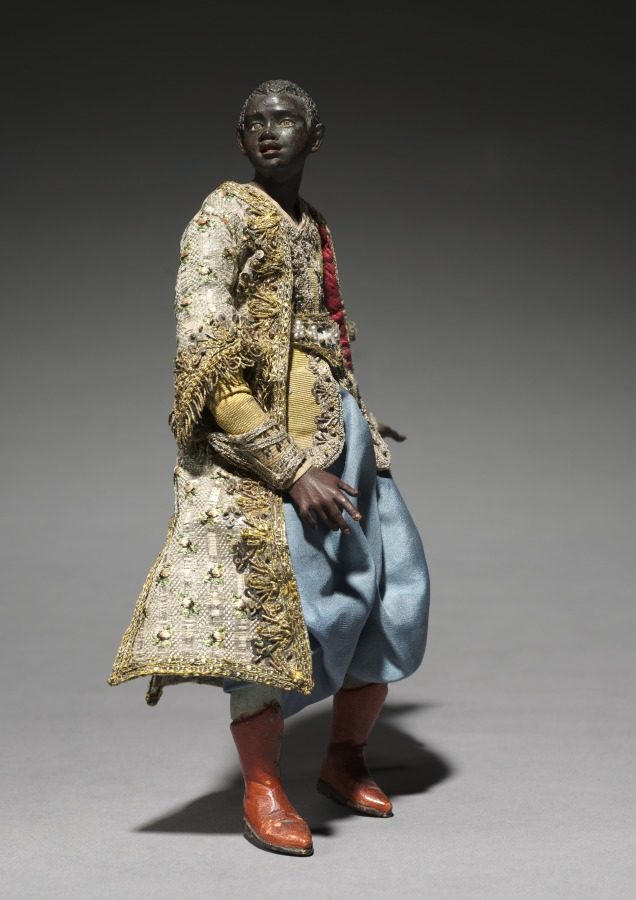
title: Figure from a Crèche: Attendant of the Magi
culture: Italy, Naples, late 18th-early 19th century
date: 1780–1830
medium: painted wood and terracotta with various textiles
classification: Sculpture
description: The practice of creating scenes of the Nativity for the home dates from the early 1700s in Italy, where people began to set up doll-like figures of about a foot or less in height. The custom was particularly popular in Naples around 1800, where crèche scenes (crèche means cradle, or crib) included many figures, whose heads and hands of painted terracotta, stuffed cloth bodies, and clothing adapted from contemporary local costumes gave them an amazingly realistic character. Representations of the birth of Jesus can be traced to the first few centuries of Christianity. Both living creatures and sculptural depictions of them were used from early times. By the late Middle Ages it was customary to create life-size figures of wood or stone, naturalistically painted, to represent the characters who participated in the events of Jesus's early life. These sculptures were then arranged in scenes illustrating one or both of the most important of these events, the Adoration of the Shepherds and the Adoration of the Magi—the three kings from the east who came to pay homage to the Christ child. Used in churches, these large figures were especially popular in Italy, Central Europe, Spain, and Portugal.